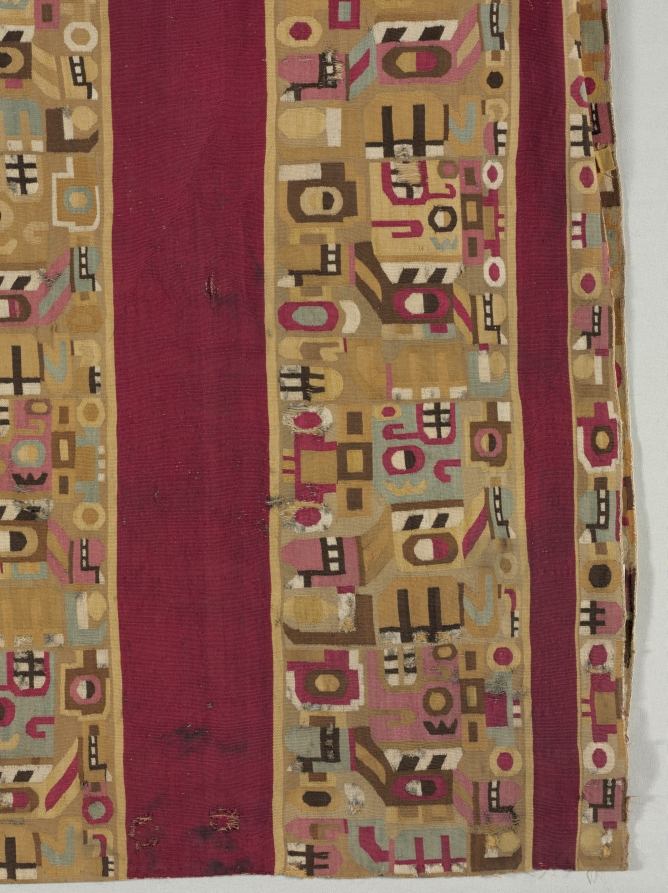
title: Tunic with Sacrificer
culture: South America, Peru, Central Andes, Middle Horizon, Wari people, 7th-11th century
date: 600–1000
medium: camelid-fiber, cotton; tapestry weave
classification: Textile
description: An extremely abstract supernatural sacrifice repeats in different colors and orientations across the body of this tunic, which was shortened on one side in antiquity. Look for the toothy black-and-white mouth in the sacrificer's upward-gazing head; other facial features include a button nose and a vertically divided eye. The figure holds the L-shaped haft of an axe behind its back and, at the front of its body, a short staff with a severed, upside-down human head on the top.